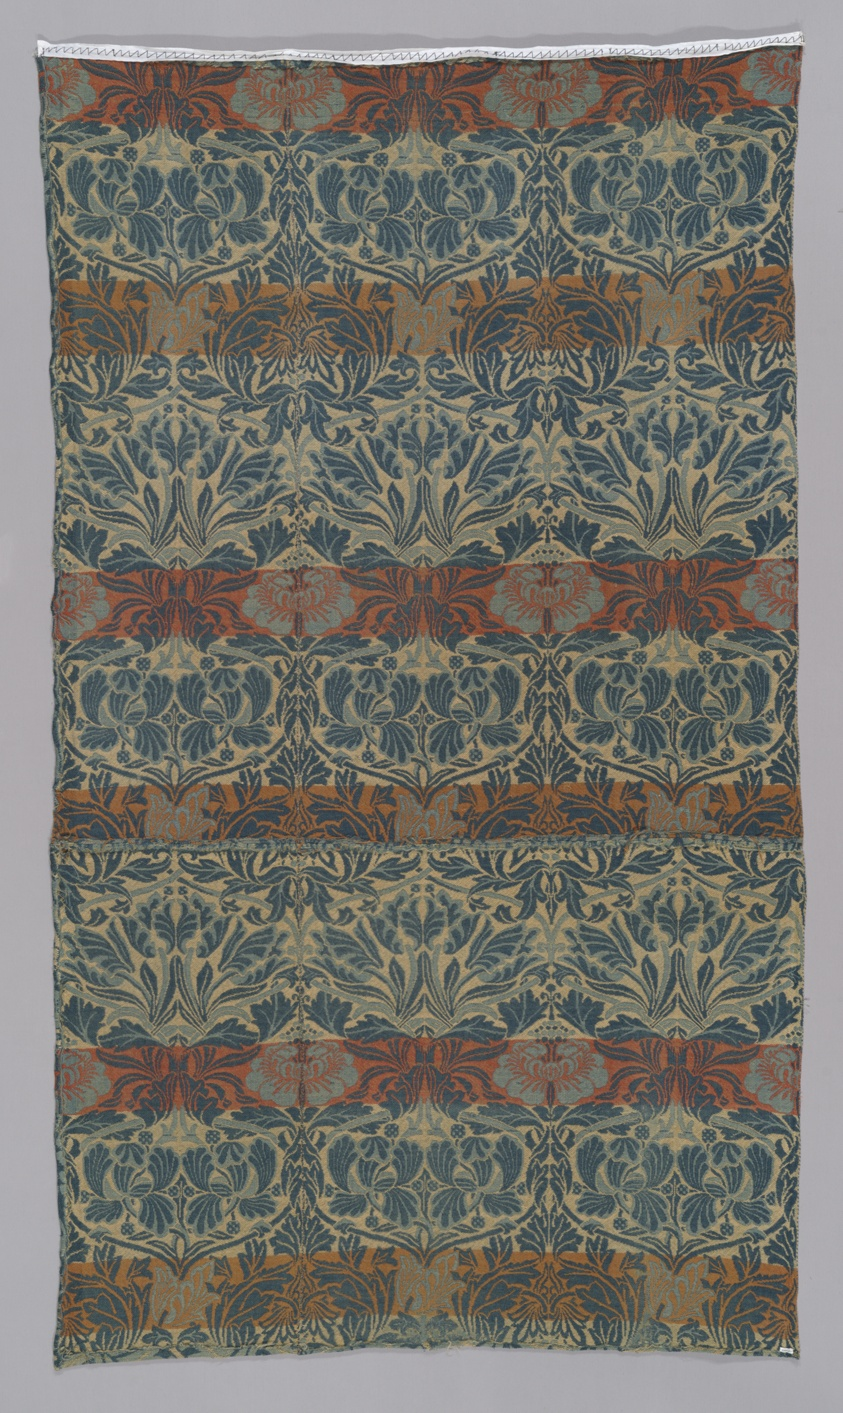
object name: Textile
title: Tulip and Rose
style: Arts and Crafts Movement, british, 19th century, 20th Century, British Arts and Crafts Movement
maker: Designed by William Morris (English, 1834–1896); Produced by Morris & Co., London (English, 1875–1940); Probably woven by Heckmondwike Manufacturing Company, Yorkshire (English, founded 1873)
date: Design 1876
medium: Four panels joined: wool, plain weave triple cloth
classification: textile; weaving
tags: floral, foliage, botanical